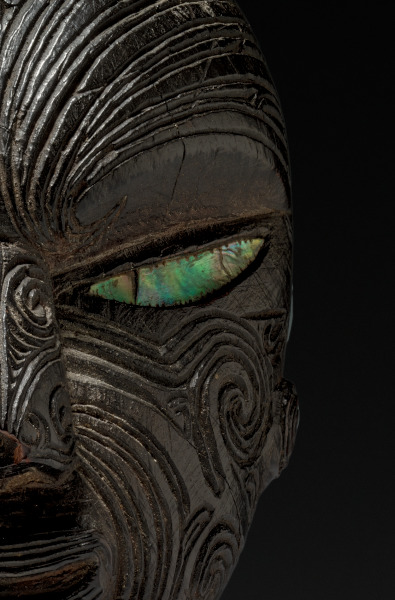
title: Fishing Canoe Prow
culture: Polynesia, New Zealand, Maori people, 19th century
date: 1800s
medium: wood with haliotis (pearl) shell inlay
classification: Sculpture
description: Intricate surface patterning characterizes Maori wood carvings. The swirls and spirals covering the face on this canoe prow replicate traditional facial tattoo patterns. Similar designs were used for post and gable figures that adorned both dwellings and compounds.